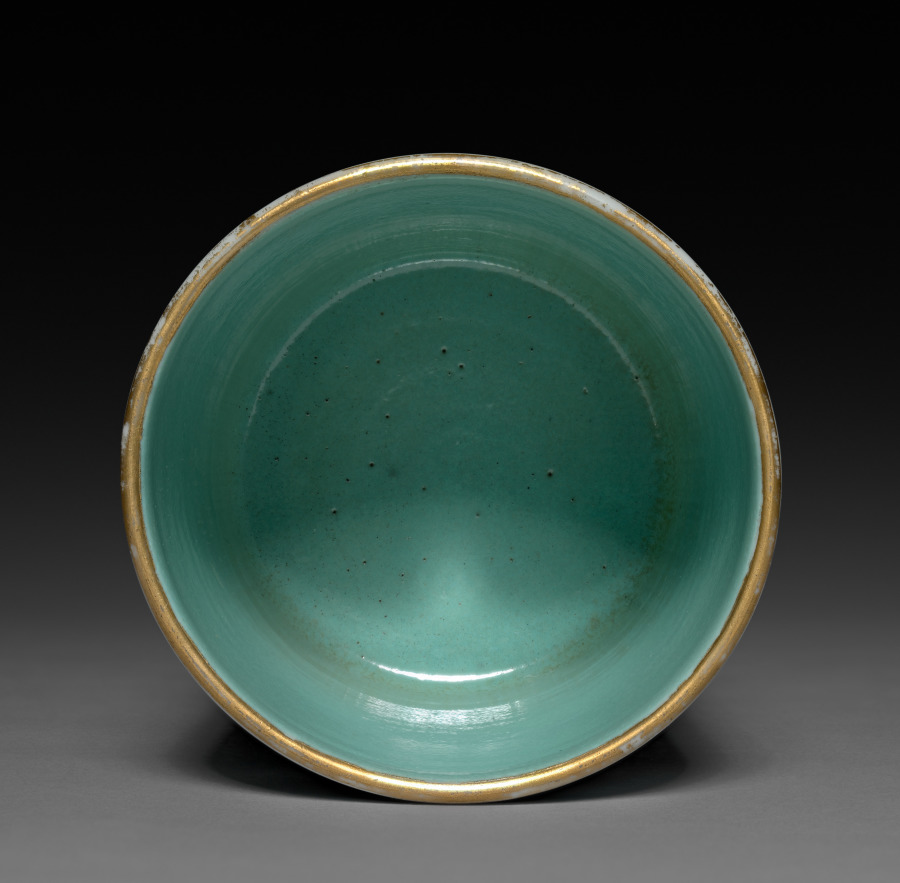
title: Cylindrical Brushholder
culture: China, Qing dynasty (1644–1911), Qianlong reign (1736–95)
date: 1736–95 or later, mid-1800s?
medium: porcelain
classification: Ceramic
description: The brush holder shows children celebrating seasonal festivals, pursuing games, and masquerading as adults with attributes that suggest their future careers in the military or civil service. Three boys play in the shadow of a garden rock with cricket cages; others parade a boy on a goat who wears the headgear of a scholar who passed first in the state examinations. Left to the goat kneels a boy who is about to ignite fire crackers lined up on a stone, a custom to celebrate the New Year. Moreover, the combinations of motifs form puns that express auspicious wishes.